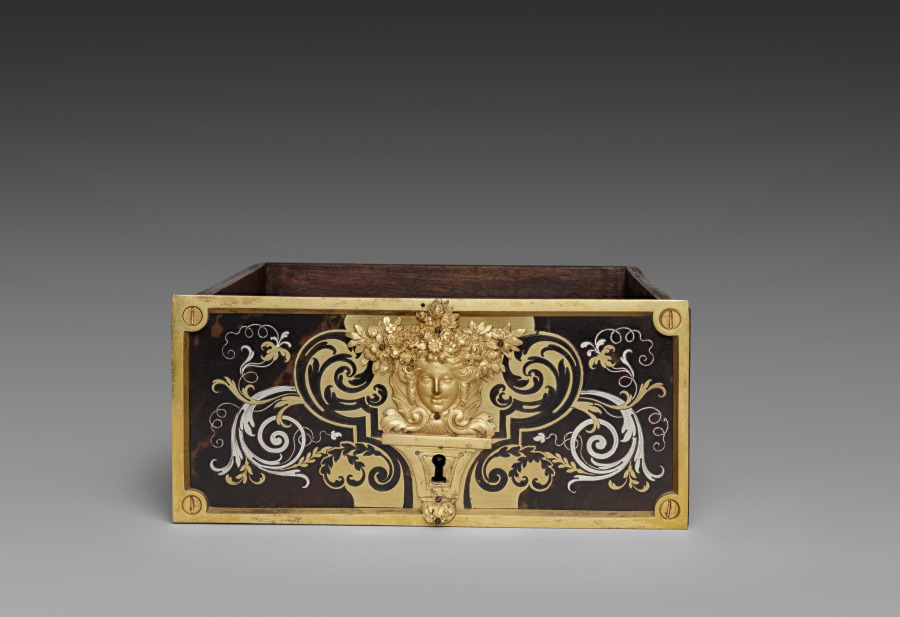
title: Side Drawer for Cabinet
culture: France, late 17th Century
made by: André-Charles Boulle (French, 1642–1732)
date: c. 1690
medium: ebony, marquetry in metal and tortoise shell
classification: Furniture and woodwork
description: Appointed cabinetmaker to King Louis XIV in 1672, André-Charles Boulle became a master of furniture making in France during the late 1600s until his death in 1732. Known primarily for his use of marquetry, in which metal patterns are inlaid into tortoiseshell then applied within the veneered surface of the furniture, Boulle established a level of quality and craftsmanship few others could achieve. As a result, his work found favor at the royal court and among other aristocrats and diplomats eager to impress the king. The inclusion of a medallion depicting Louis XIV within the bronze decoration of this chest would have identified the owner with the royal court. Often exhibiting stout architectural proportions with elegant groups of inlaid motifs such as the parrot on the central panel of this chest, Boulle’s designs are an example of the intellectual fashion for contrasting ideas, materials, and motifs.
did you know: Originally designed to sit atop an elaborate tall stand, this chest was likely altered in the late 1700s to reduce its scale and height.